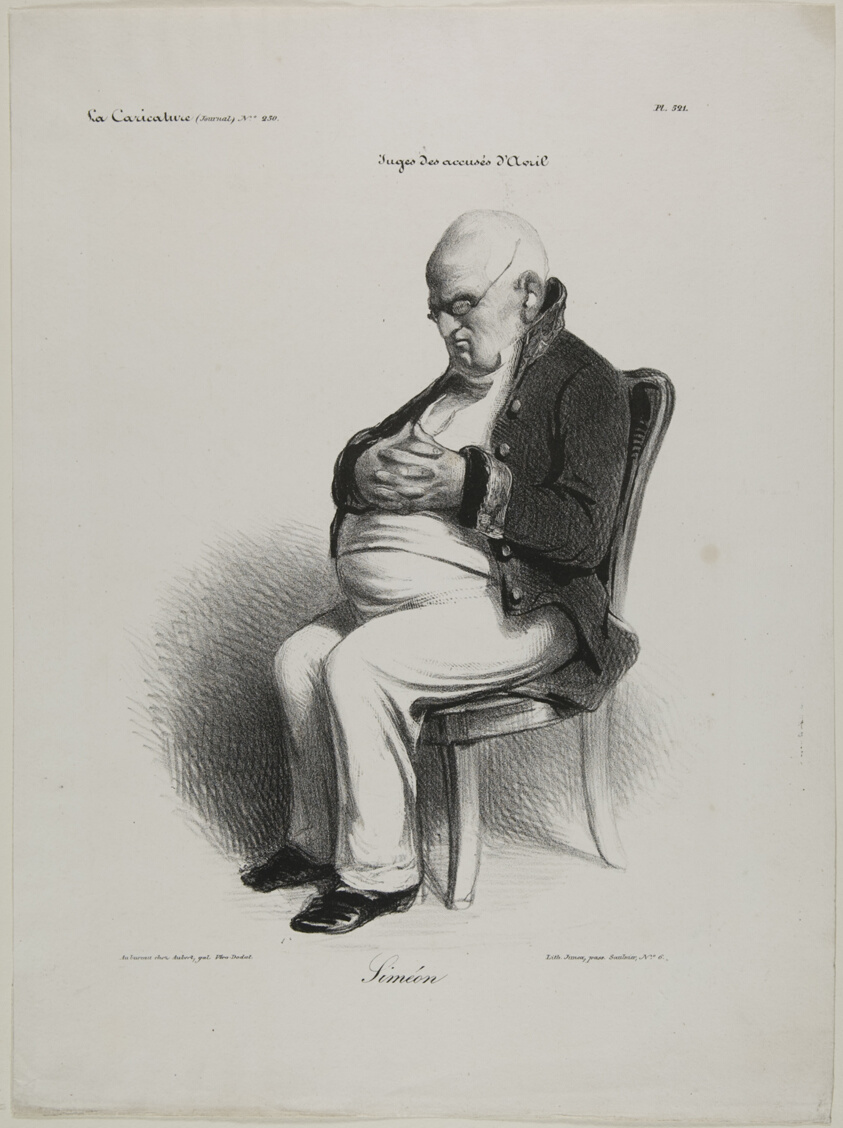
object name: Print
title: Siméon, plate 521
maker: Honoré Victorin Daumier; French, 1808-1879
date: 1835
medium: Lithograph in black on white wove paper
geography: France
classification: lithograph; print; prints and drawing